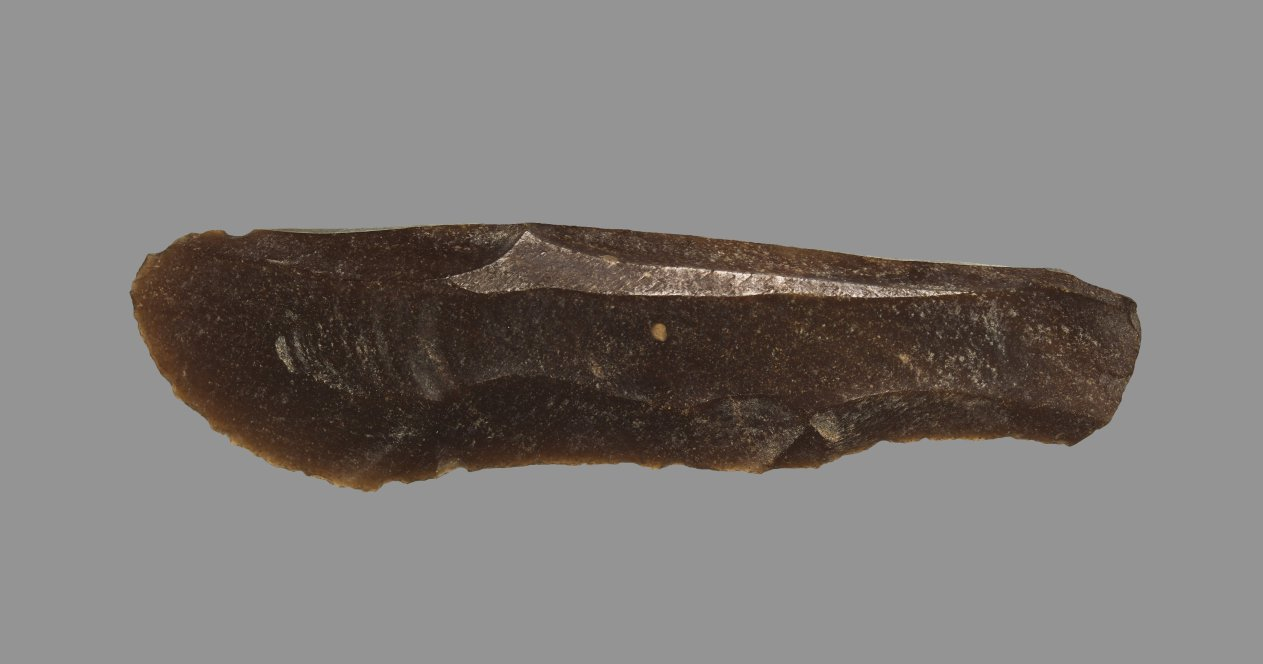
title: Sickle Blade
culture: Egypt, Middle Kingdom (2040–1648 BCE), Dynasty 12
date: 1980–1801 BCE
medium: flint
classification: Implements